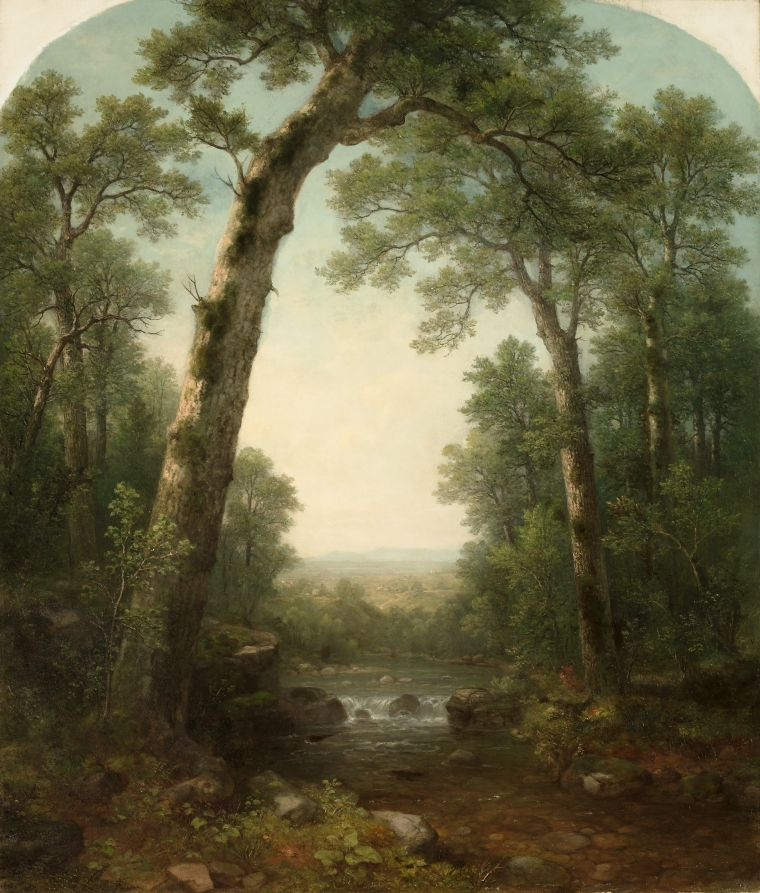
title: Forest Stream with Vista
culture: America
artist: Asher B. Durand (American, 1796–1886)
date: 1872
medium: oil on canvas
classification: Painting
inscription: Signed lower left: "A B Durand / 1872"